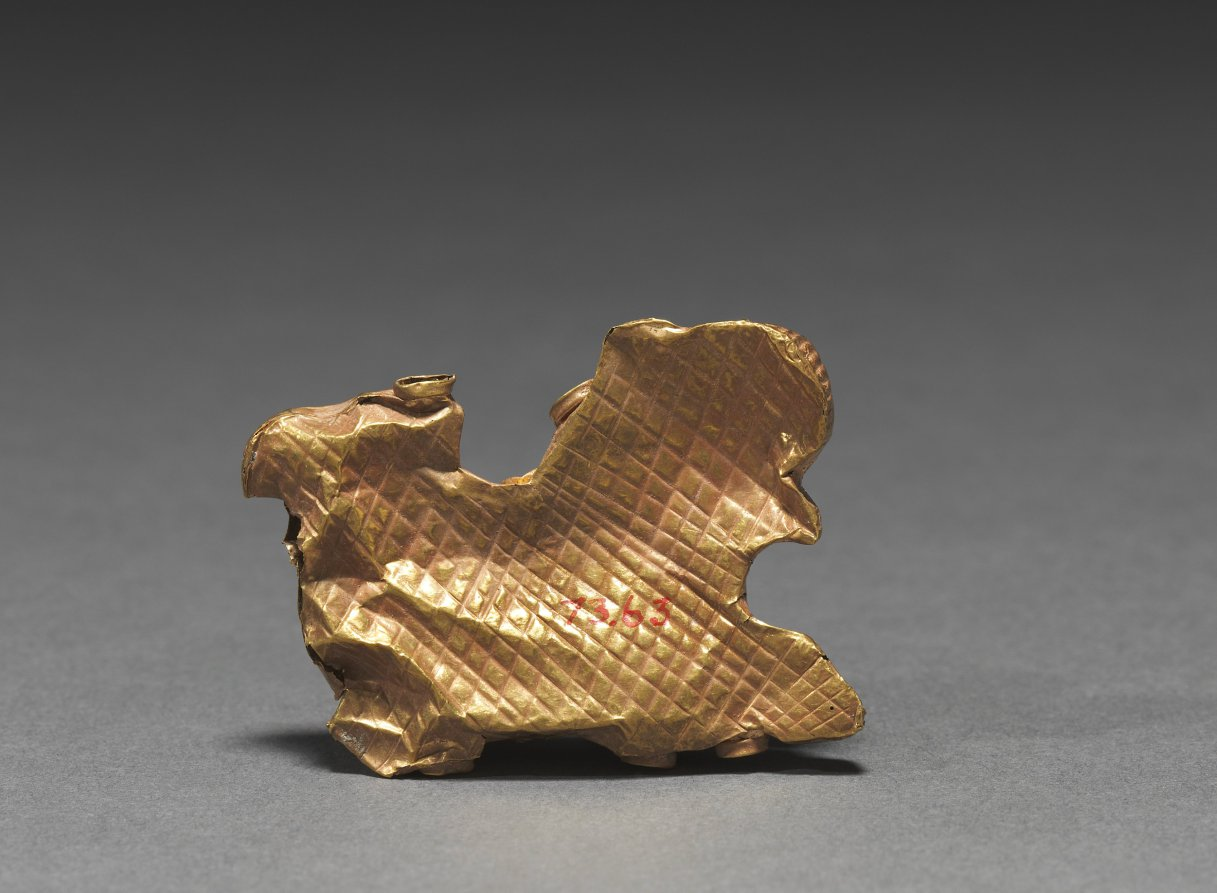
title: Pendant in the Shape of a Fish-Tailed Elephant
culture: India, Shunga period (185–78 BCE)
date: 185–72 BCE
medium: gold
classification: Jewelry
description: Because of water's life-giving properties, animals such as fish and Indian elephants who love the water were considered auspicious. This composite elephant with a playfully raised trunk and a curling fish tail would have been strung as a pendant on a necklace.